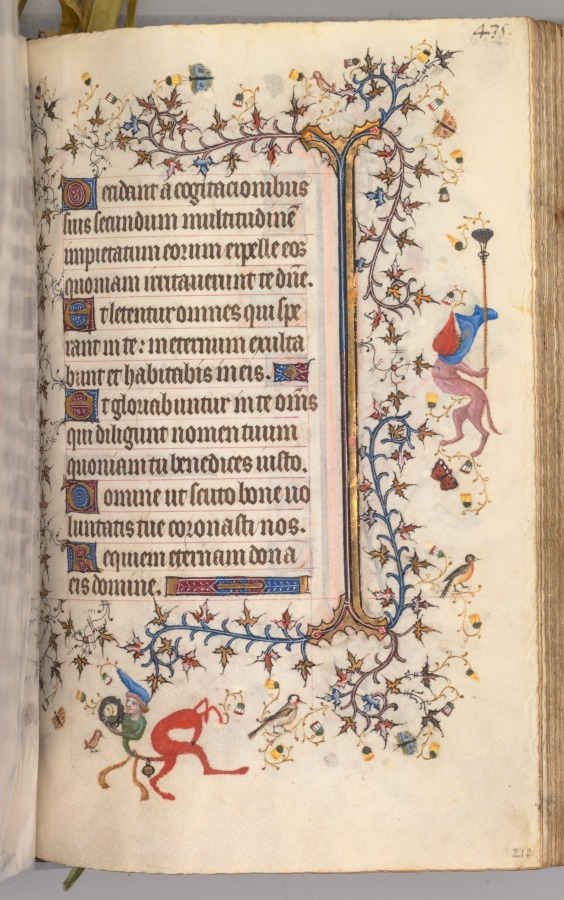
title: Hours of Charles the Noble, King of Navarre (1361-1425): fol. 212r, Text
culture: France, Paris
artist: Master of the Brussels Initials and Associates (French)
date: c. 1405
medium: ink, tempera, and gold on vellum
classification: Bound Volume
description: This precious volume was obviously highly prized by its owner, the French-born King of Navarre, who had his coat of arms painted on no less than twenty folios. Rather than directly commissioning this manuscript from a specific workshop, it seems that Charles the Noble acquired his book of hours -- perhaps ready-made for the luxury market -- while on a trip to Paris in 1404-05. A collaborative effort, six painting styles are evidenced within the pages of this codex, those of two Italians, two Frenchmen, and two Netherlanders. The painter who was responsible for the planning and decoration of the book, and who produced seventeen of the large miniatures, was a Bolognese artist known as the Master of the Brussels Initials. His principal assistant, responsible for most of the borders, was a Florentine who signed his name "Zecho" da Firenze on folio 208 verso.